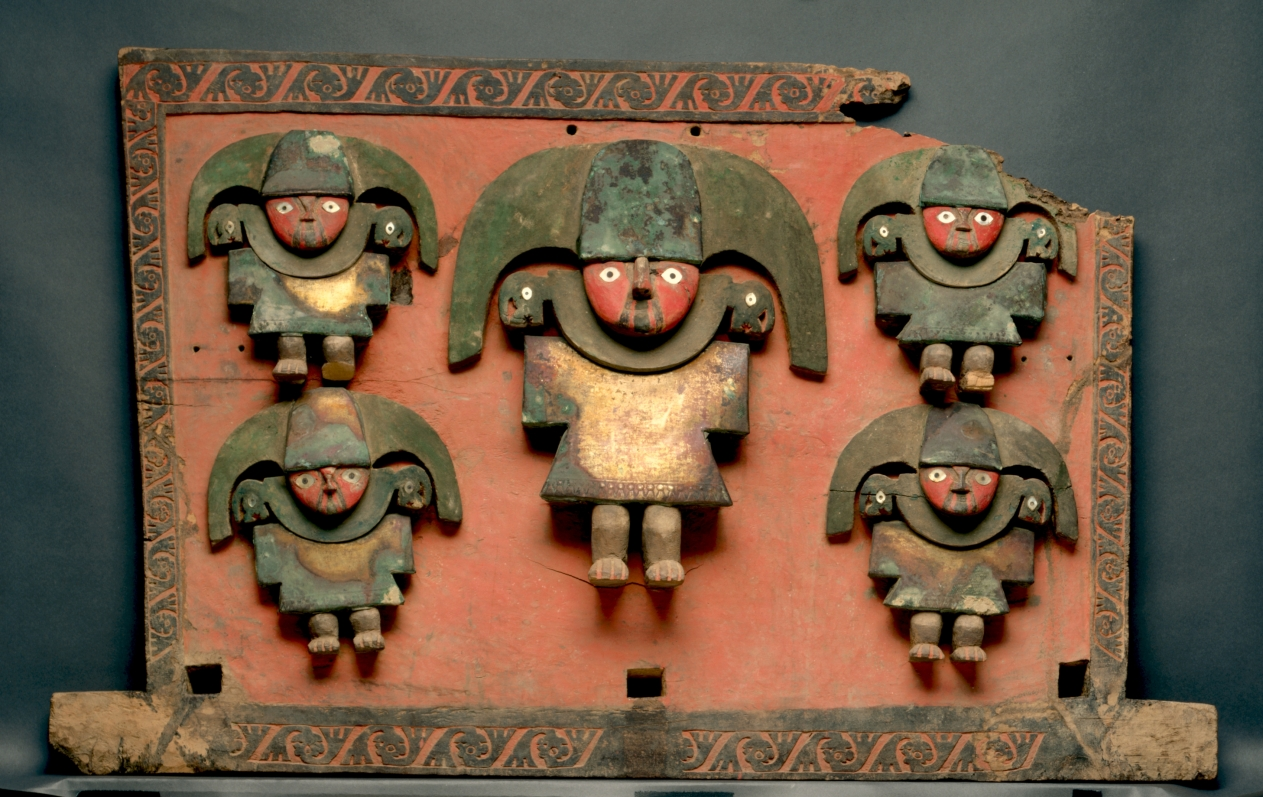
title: Backrest of a Litter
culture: Central Andes, North Coast, Chimú people, late Intermediate period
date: 1185–1275 (radiocarbon date, 95.4% probability)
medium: mixed media: wood, gold alloy, pigment, shell inlay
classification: Sculpture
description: This rare, dramatic object served as the back support of a litter carried by human porters, a mode of transport reserved for honored members of many societies without draft animals or wheeled vehicles. The simple, bold figures—perhaps a Chimú lord and four officials—all wear wide collars, tunics, and crescent headdresses that are either brightly painted or covered with golden but now-corroded sheet metal. The holes at the bottom probably served as lashing points for a beam that supported the litter's seat.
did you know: Cinnabar, a toxic mercuric sulfide, was used to color the red background and faces of the figures.